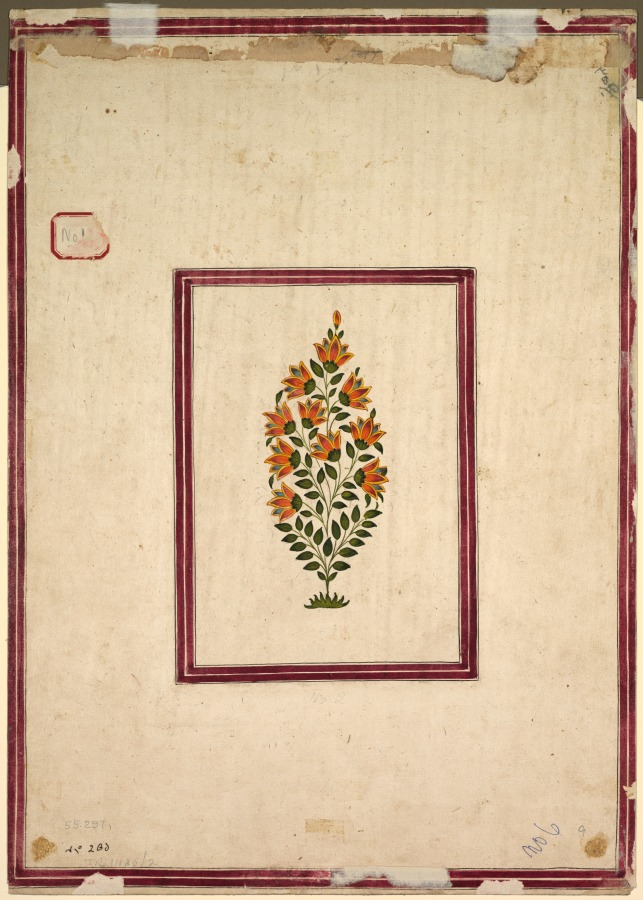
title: Princess and attendant in trompe l’oeil window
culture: Mughal India, Uttar Pradesh, Lucknow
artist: Aqil Khan (Indian, active mid-1700s)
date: c. 1765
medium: Gum tempera, ink, and gold on paper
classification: Painting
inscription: 'amal 'Aqil Khān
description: A golden window shade has been rolled up to reveal a princess seated on a terrace. The carpet draped over the sill echoes that of the balcony rail where royals would show themselves to the public. Rather than taking the view of an outsider, the viewer looks from inside the palace out to the women and the wooded landscape beyond. During the mid-1600s, the Mughal court introduced a preference for the patterns on carpets and textiles: flowering plants on a plain ground. This influential fashion derived from their appreciation of European botanical studies that merchants and diplomats brought to India.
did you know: Unlike in portraits of the emperor, women sit on the outside of the royal window.